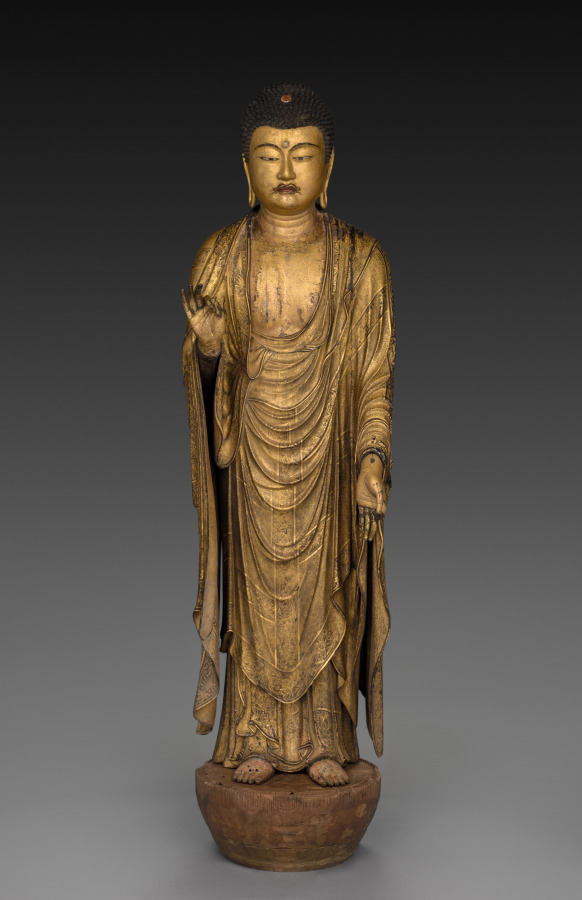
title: Buddha of Infinite Life and Light (Amida Nyorai)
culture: Japan, Kamakura period (1185–1333)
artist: Kōshun (Japanese, active mid-1200s)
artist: assisted by Koshin (Japanese, active mid-1200s)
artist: assisted by Joshun (Japanese, active mid-1200s)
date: 1269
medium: Cypress with lacquer, color, gold, cut gold, rock-crystal inlaid eyes, and quartz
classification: Sculpture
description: This ornate Buddha Amida stands in a posture of welcome, greeting the dying who will accompany him back to his Pure Land. Documents inserted into the sculpture’s hollow core around the time of its creation include a copy of the sacred text Amida Sutra, a register of donors who desired to be joined together in generating karmic merit (kechien) through the creation and dedication of the sculpture, and a record asserting that the image was completed over the course of 33 days in 1269 at Shitennōji Temple in Osaka.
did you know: The lead sculptor was Kōshun, who had been granted the lofty title “Bridge of the Law.”